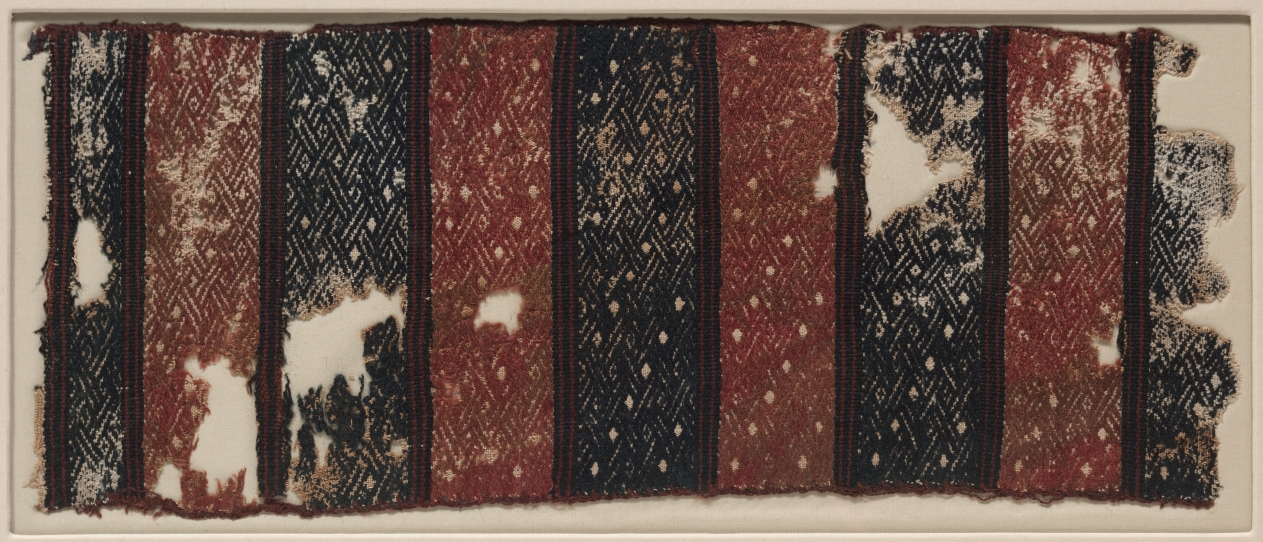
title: Textile Fragment with Interlace Pattern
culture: Peru, South Coast, Paracas, Yauca Valley(?)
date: 700–400 BCE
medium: camelid fiber and cotton; brocaded plain-weave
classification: Textile